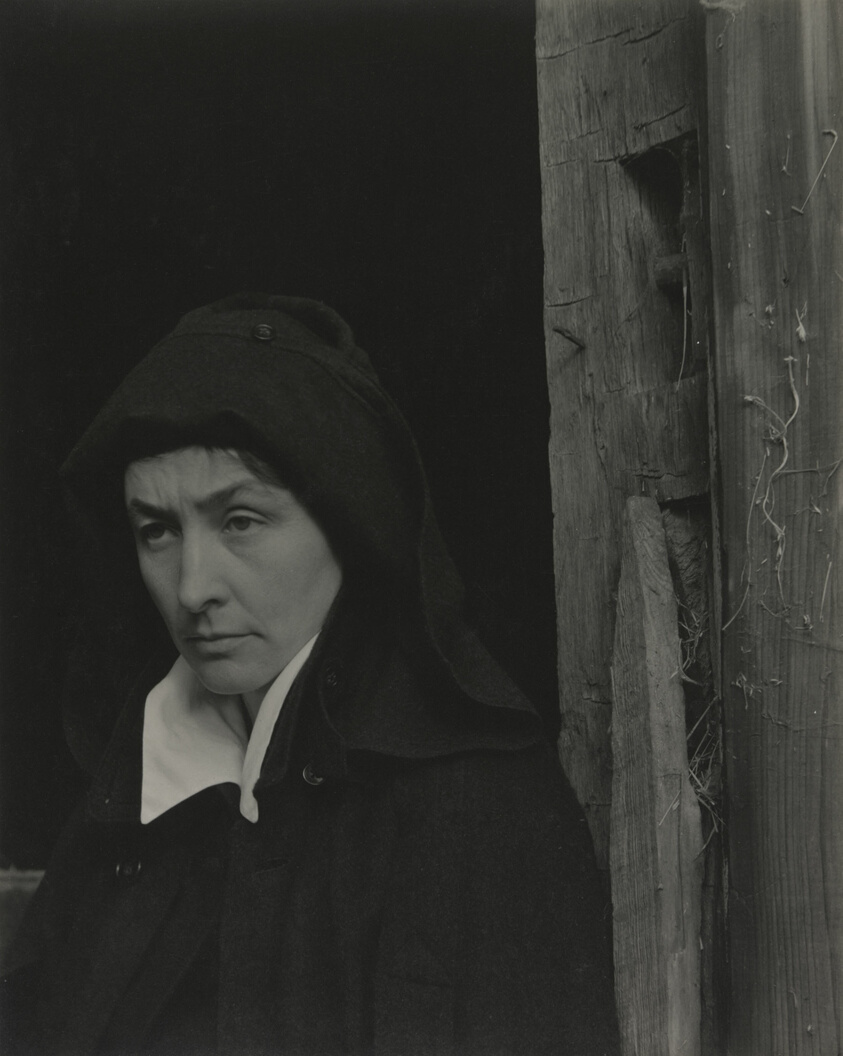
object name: Photograph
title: Georgia O'Keeffe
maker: Alfred Stieglitz (American, 1864–1946)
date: 1922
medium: Gelatin silver print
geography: United States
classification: gelatin silver (developing-out-paper) pr; photographic process; photography; photograph